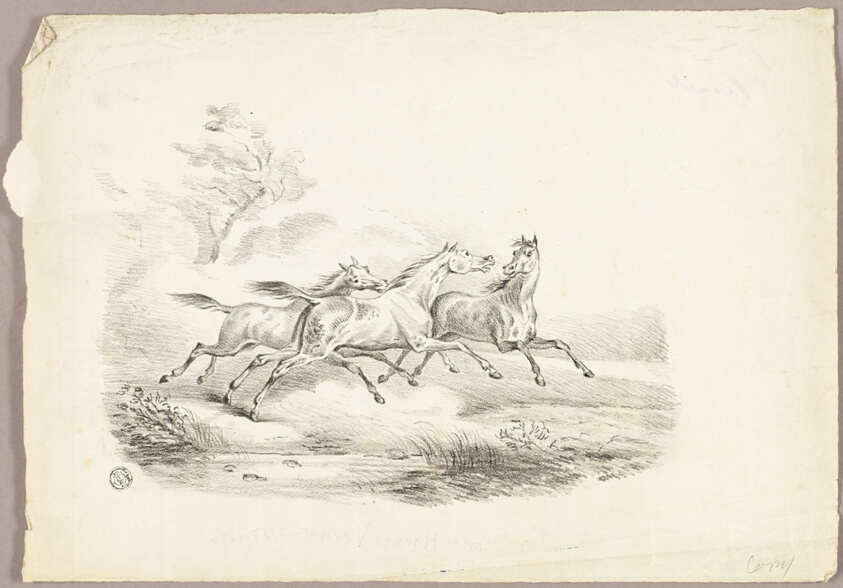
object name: Drawing and Watercolor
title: Three Horses Running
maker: Possibly after Carle Vernet; French, 1758-1836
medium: Black chalk on ivory wove paper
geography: France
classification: chalk; paper; drawings (visual works); prints and drawing